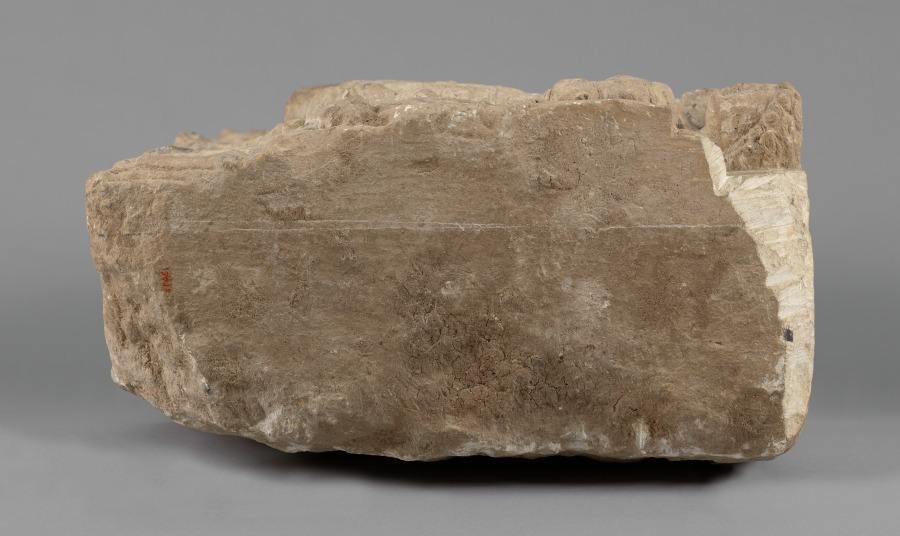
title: Procession of Nobles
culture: Syria, Palmyra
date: 100–150 CE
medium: limestone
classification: Sculpture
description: Palmyra was a key center for trade between the Roman and Parthian Empires. This unique relief has been associated with Palmyra only through stylistic comparisons; it is not known where it was found on the site. It depicts men in Parthian dress riding Arabian horses with bejeweled harness trappings ahead of riders on camels—a possible reference to the caravans that made Palmyra so wealthy. Although all of the riders are dressed and equipped as Parthians, the proportions and perspective of the scene seem to be informed by Greco-Roman conventions. It may depict a ceremonial procession.